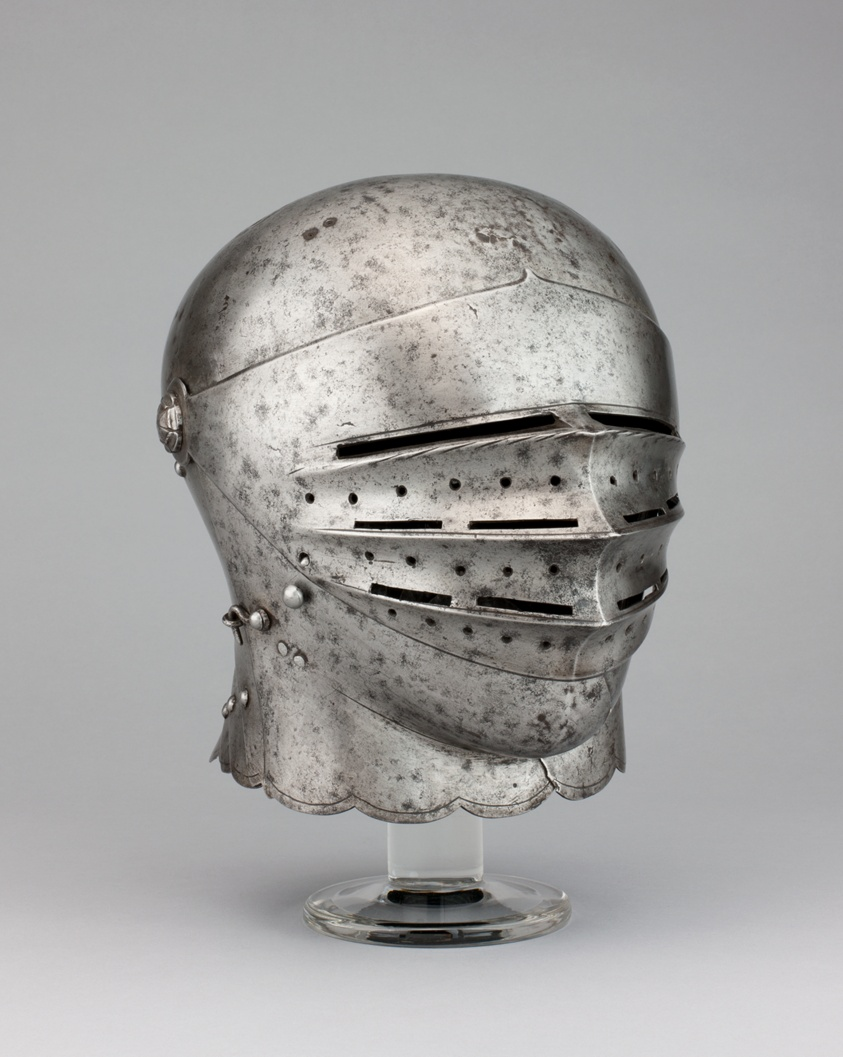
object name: Armor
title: Close Helmet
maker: German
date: c. 1510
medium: Steel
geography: Germany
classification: suit-helmet; armor; arms and armor